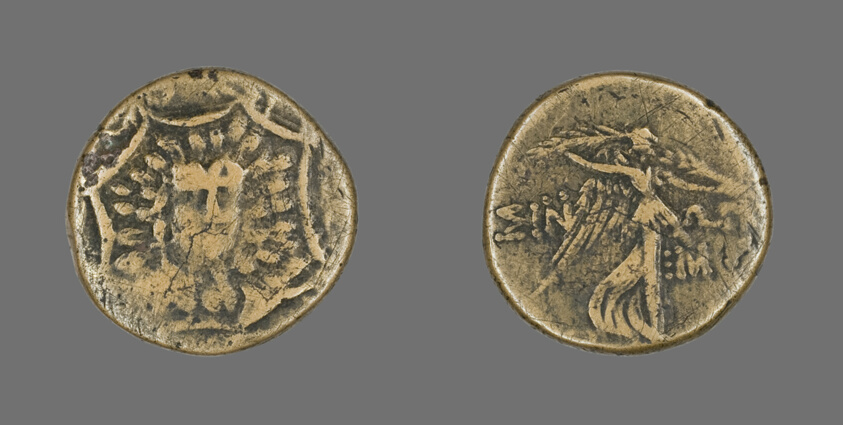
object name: Coin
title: Coin Depicting a Gorgoneion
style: greek, ancient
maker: Greek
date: 120-63 BCE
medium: Bronze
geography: Ancient Greece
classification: coin; ancient art